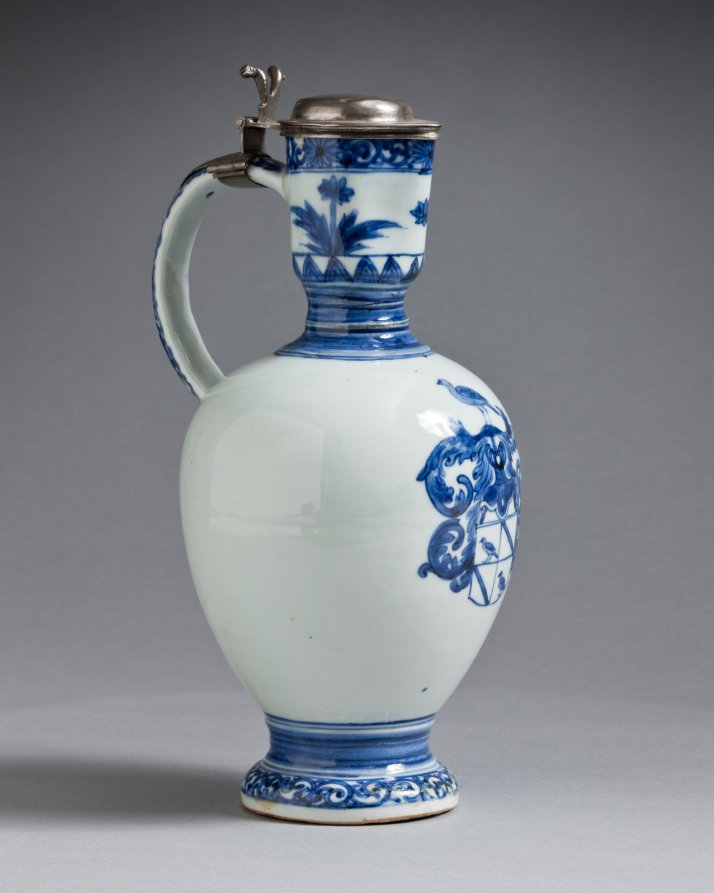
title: Jug with Silver Mounts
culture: Japan, Edo period (1615–1868)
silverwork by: Barent van Leeuwen (Dutch, 1637–1682)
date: c. 1662–76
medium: porcelain with underglaze blue decoration and silver mounts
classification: Ceramic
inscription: [on silver]: town mark for Amsterdam; lion rampant crowned (alloy mark for 0-934 silver); d (date letter for 1666), maker's mark of Barent van Leeuwen.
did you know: The coat of arms on this jug are those of the Valckenier family, active in the Dutch East India Company.